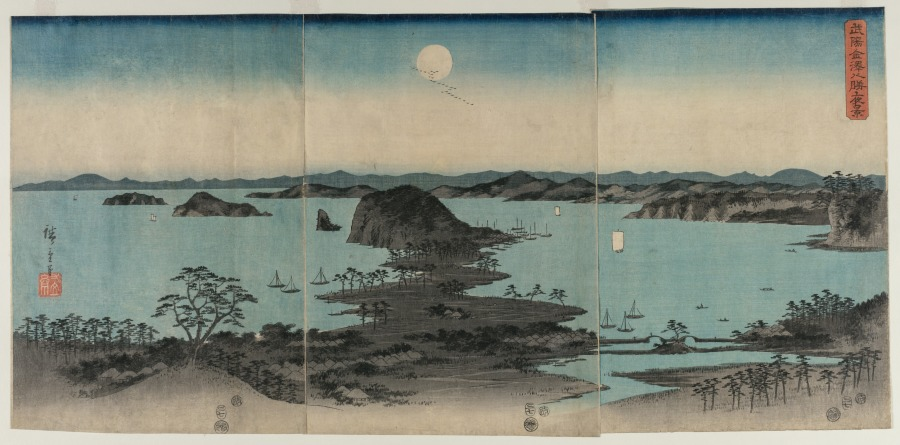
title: Eight Views of Kanazawa at Night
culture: Japan, Edo period (1615–1868)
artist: Utagawa Hiroshige (Japanese, 1797–1858)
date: 1857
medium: Triptych of color woodblock prints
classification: Print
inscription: Signature: Hiroshige hitsu (left panel). Artist Seal: Ichiryusai. Publisher: Okazawaya Taheiji. Censorship seal: aratame.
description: Late in his career, Hiroshige explored the poetic theme of setsugekka, “snow, moon, and flowers,” in a set of three triptychs. This panoramic scene shows the autumn moon over Kanazawa, near Tokyo. Hiroshige’s contemporaries would have recognized the coastline dotted with villages, fishing boats, and the distinctive double-arched bridge at the bottom right.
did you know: The red cartouche on the right gives the title of the print, while the artist’s signature and red seal are on the far left.